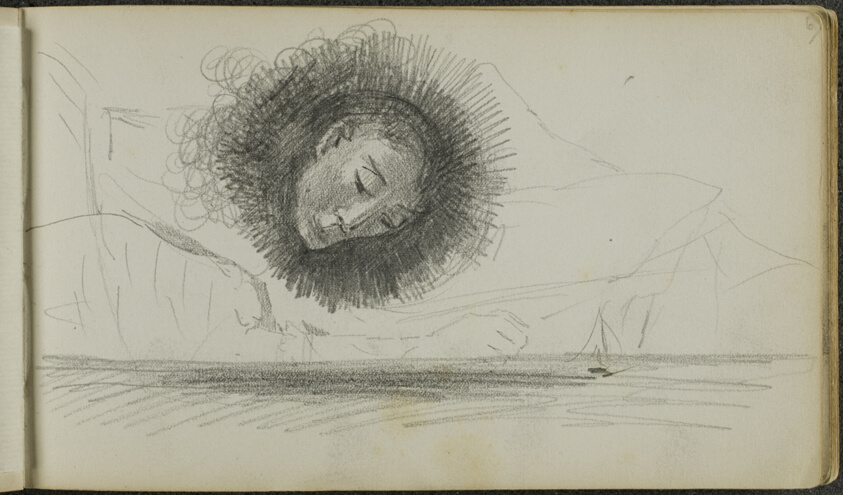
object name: Book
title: Sketchbook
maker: Odilon Redon (French, 1840-1916)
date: c. 1879–85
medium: 55-page sketch book of drawings in pencil on cream wove (with a few buff and blue) paper, with (simulated) laid paper interleaves, bound in black cardboard with black fabric taping on spine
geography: France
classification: sketchbook; graphite; prints and drawing; book; paper